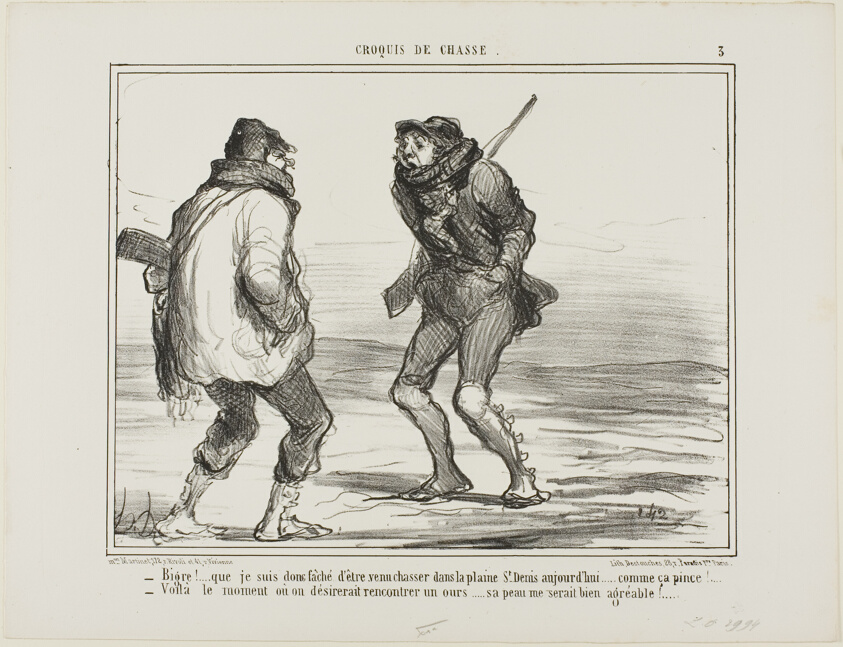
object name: Print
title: “- Brrrr! I am furious that I came here to hunt in the St. Denis-Plain. It's just too cold!… - One of those days when you would love to catch a bear. His fur would be more than welcome right now!,” plate 3 from Croquis De Chasse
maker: Honoré Victorin Daumier; French, 1808-1879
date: 1858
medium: Lithograph in black on white wove paper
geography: France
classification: lithograph; print; prints and drawing